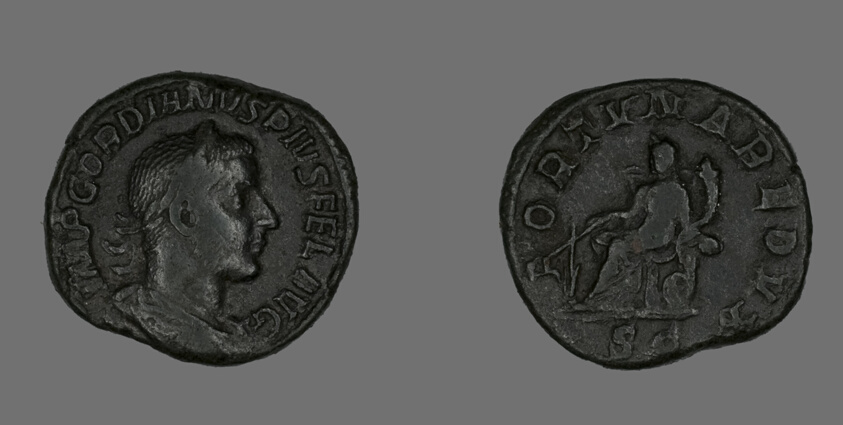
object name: Coin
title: Sestertius (Coin) Portraying Emperor Gordianus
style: roman (ancient, style or period), ancient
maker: Roman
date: 238-244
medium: Bronze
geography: Roman Empire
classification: coin; ancient art